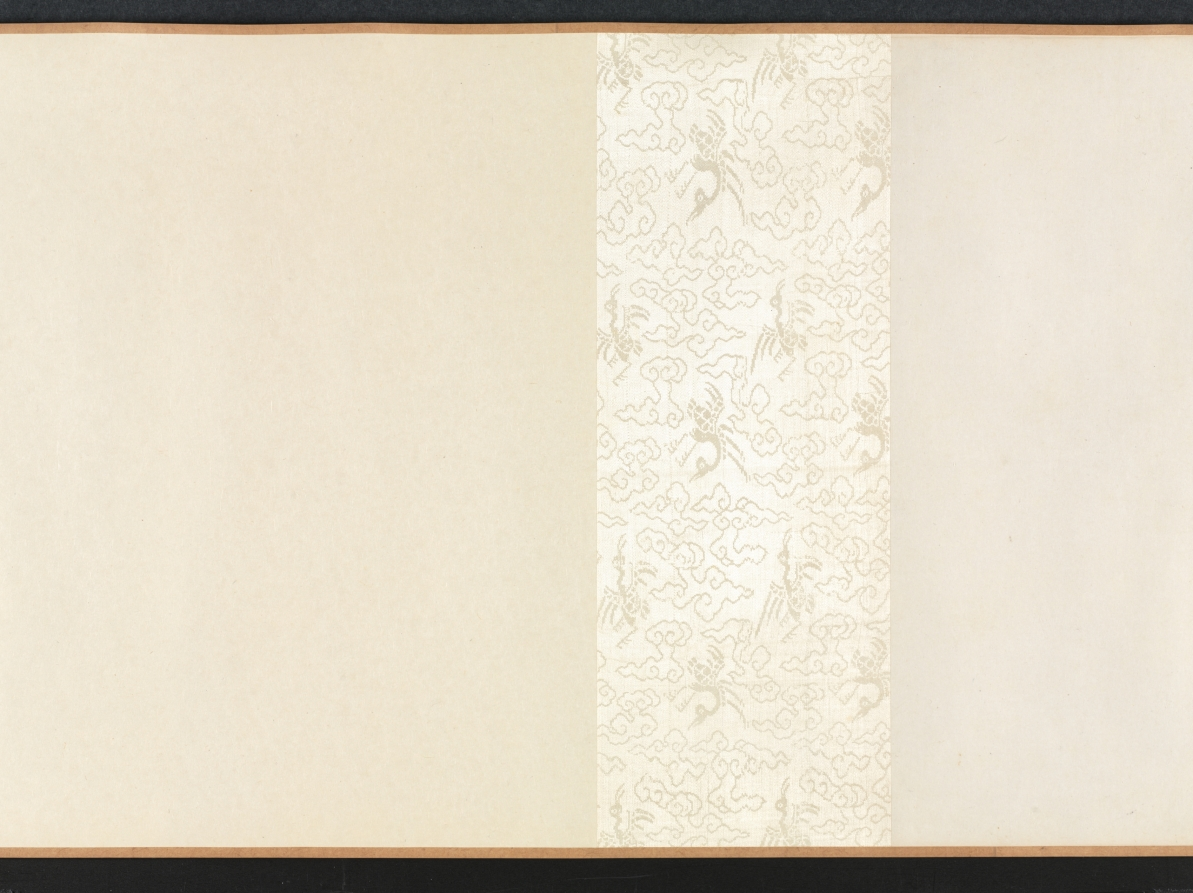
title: Hall of Lofty Pines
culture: China, Qing dynasty (1644-1911)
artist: Wang Hui (Chinese, 1632–1717)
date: 1703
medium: handscroll; ink and color on paper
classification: Painting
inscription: [題] 松喬堂圖 康熙癸未夏六月, 海虞耕煙散人王翬畫。[印]王翬之印; 石谷. [左下] 來青閣; 耕煙野老時年七十有二.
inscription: 松喬堂圖一卷，海虞石谷王君為靜海近公厲少司冦公作也。圖成于癸未之夏。未幾而公遂仙去。公令子今編修君南湖屬余題跋其後。余與公同官侍從，交契最深。側見公之清修純德，蔚為聖天子所眷重。侍直內廷，密勿贊襄，幾二十餘年。蒼生之所以受賜，士林之所以沐德者，天下莫能窺，在廷莫能悉。而公卒不言。以故宸衷日益契，恩禮亦日益渥。雖年逾懸車，時有歸老之念。而上固不聼公之去。其所謂松喬堂者，御書以賜公者也。蓋以松比公之清風勁節，而歲寒不改，經霜彌茂。則又以期公之壽考未有艾焉。公知此身未易乞，而山林槃磵之樂，止可寄諸寤思。此松喬堂圖之所由作也歟。石谷此圖，結構精密，筆墨超邁。其寫樹木之蒼蔚，堂宇之靚幽。恍見摩詰輞川樂天廬山之勝。獨惜公未得一日徜徉故園以償其願。即繪於圖亦未得以永其趣，此編修君之所以眷眷不忘也。雖然千歳之松喬，下蔭百畝，上以修棟梁之需。然則上當日名堂之意，不更望於後之人襲其芘而養其材也哉。吾願編修君之寶斯圖。并望君之塗塈丹雘，大其堂構也已矣。 康熈丙戍重陽三日，雲間王鴻緒跋。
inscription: 10 additional seals: 1 seal of Li Duna 勵杜納 (1628–1703); 4 seals of Zha Ying 查瑩 (jinshi of 1766); 5 seals of Li Yun (dates unknown).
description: Wang Hui 王翬, a leading painter in the orthodox school of the early Qing dynasty (1644–1911), was commissioned to paint this landscape with a country estate for Li Duna 勵杜納 (1628–1703), vice minister of justice in Emperor Kangxi’s court. The emperor had honored Li by granting him a piece of calligraphy with the name of Li’s retirement retreat, “Hall of Lofty Pines.” He drew a comparison between pines and Li’s upright character, resilience, and longevity. Wang Hui’s painting was supposed to allow Li to imagine living in a beautiful, secluded compound among the hills and pines. Sadly, Li died before seeing the completed painting and before receiving the emperor’s permission to retire. The landscape begins with peaceful riverbanks and low hills. The pines around the estate in the middle of the handscroll are truly lofty, some stretching even beyond the frame of the painting. Li Duna, the estate’s owner, is shown twice in his serene mountain retreat: first approaching the entrance to the compound with two servants at the right, and then later in the scroll, to the left, reading in the comfort of an inner room.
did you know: One servant carries the estate owner's carefully wrapped qin, a type of zither.